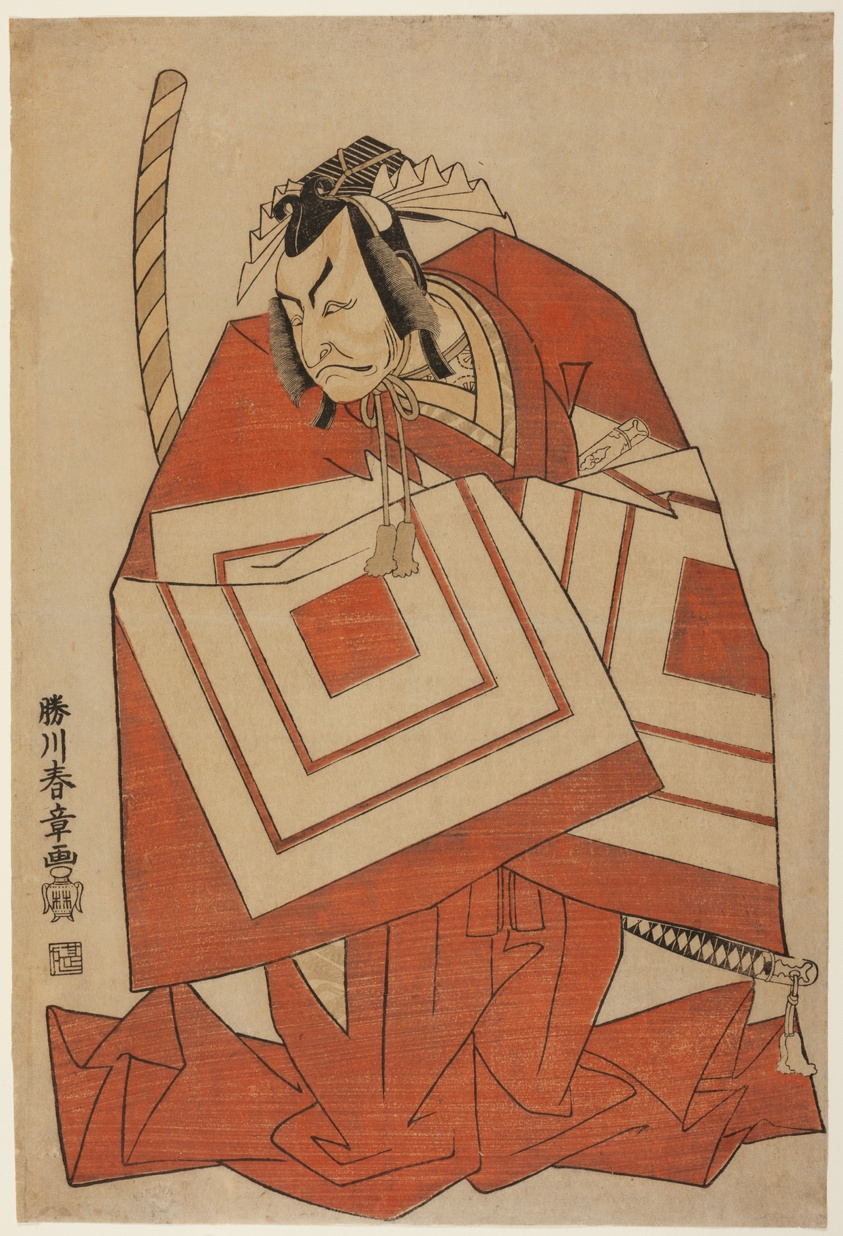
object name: Print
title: The Actor Ichikawa Danjuro IV in a "Shibaraku" Role, Possibly from the Play Ima o Sakari Suehiro Genji (The Genji Clan Now at Its Zenith), Performed at the Nakamura Theater from the First Day of the Eleventh Month, 1768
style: Japanese (culture or style)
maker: Katsukawa Shunsho 勝川 春章; Japanese, 1726-1792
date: c. 1768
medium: Color woodblock print; oban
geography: Japan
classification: woodblock print; print; asian art